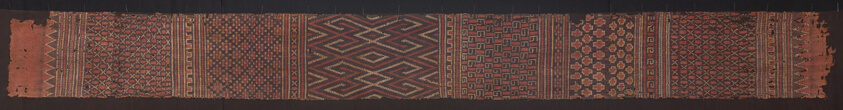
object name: Religious/Ritual Object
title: Ceremonial Textile (mbesa tali tau batu or pewo)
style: indonesian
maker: Rongkong people; Indonesia, Sulawesi, North Luwu Regency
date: 18th/19th century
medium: Cotton, plain weave with discontinuous wefts; openwork; resist dyed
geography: Sulawesi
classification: textile; weaving - printed; ritual objects